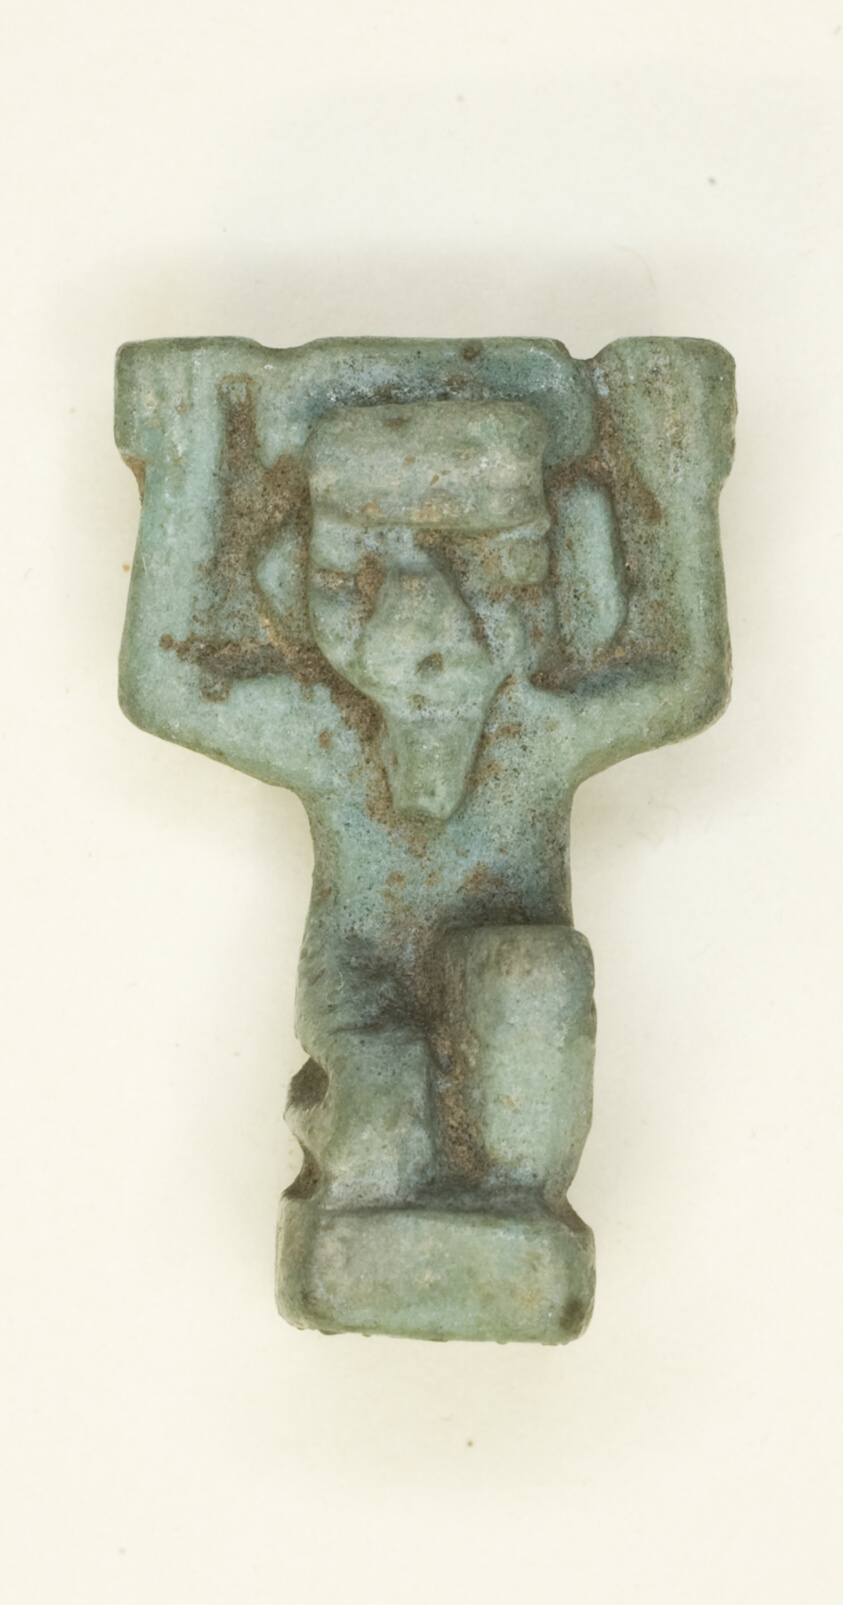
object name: Costume and Accessories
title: Amulet of the God Shu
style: egyptian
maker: Egyptian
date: Third Intermediate Period–Late Period, Dynasty 21–31 (about 1069–332 BCE)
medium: Faience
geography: Egypt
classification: amulet; jewelry; ceramics; ancient art; costume; faïence (composite material)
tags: gods (deities)